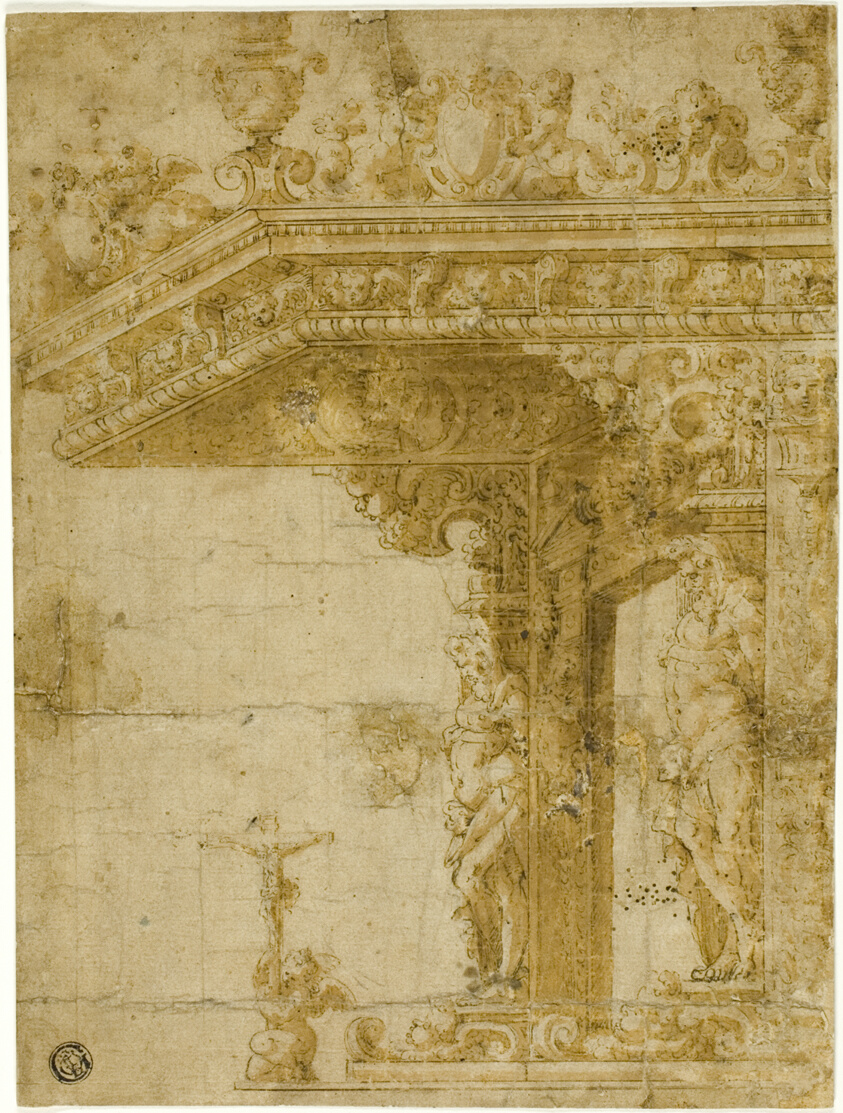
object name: Drawing and Watercolor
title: Design for Tomb with Canopy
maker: Attributed to Marco Marchetti, called Marco da Faenza; Italian, c. 1526-1588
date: c. 1550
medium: Pen and brown ink with brush and brown wash, on tan laid paper, laid down on tan laid paper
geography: Italy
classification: ink with wash; drawings (visual works); prints and drawing